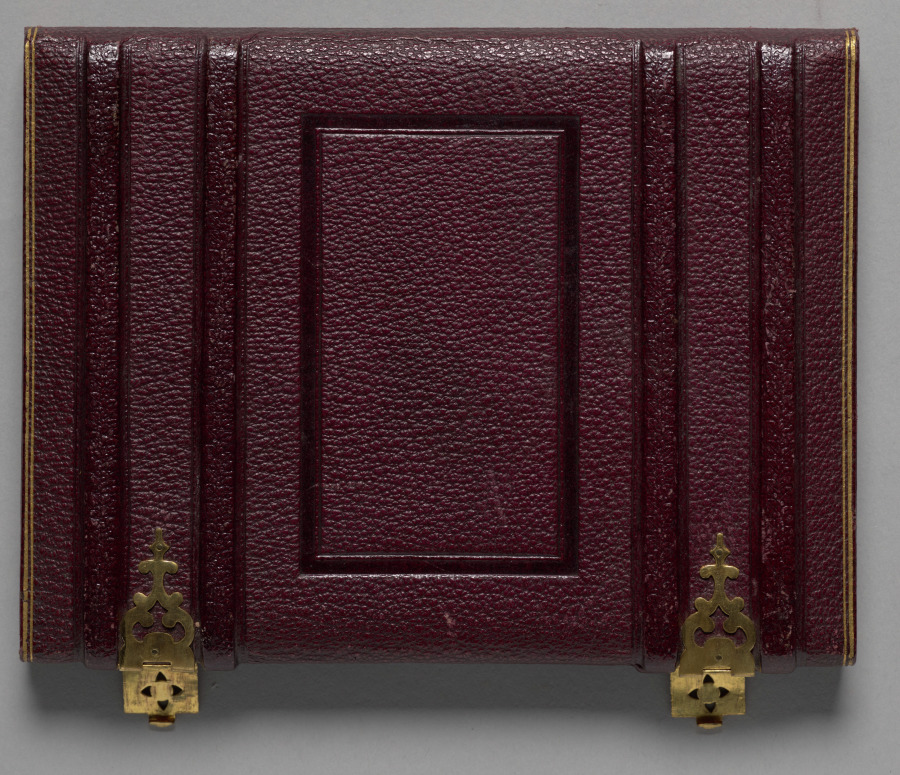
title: English family of five with marble bust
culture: England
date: 1850–65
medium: ambrotype, half plate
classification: Photograph